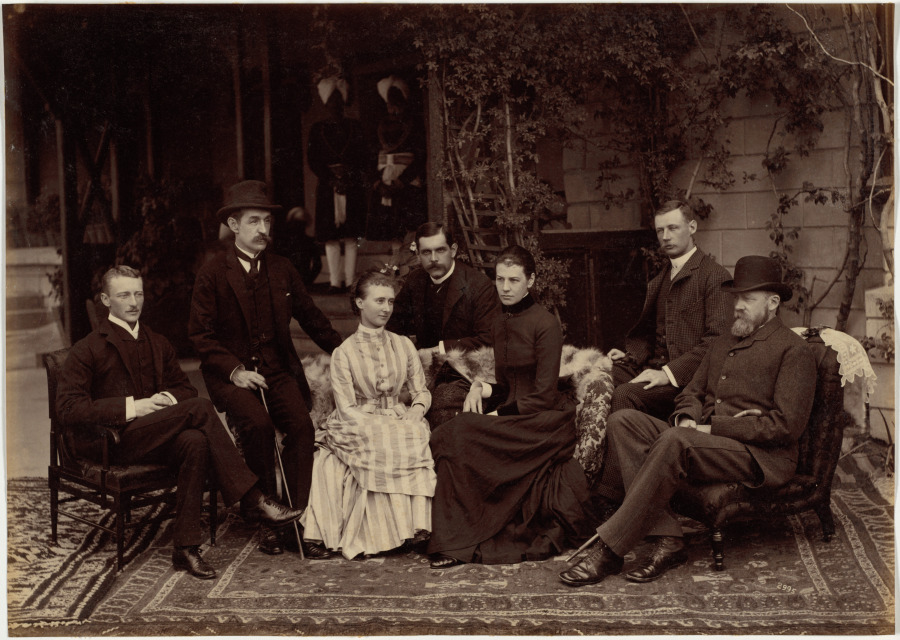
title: His Honor The Lieutenant Governor of the Punjab and Party, Shimla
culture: India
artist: Raja Deen Dayal (Indian, 1844–1905)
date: 1887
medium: albumen print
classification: Photograph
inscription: Stamped in black ink on verso: “21.G.7” Written in pencil on verso: “2995”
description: This photograph may commemorate a family reunion of the Lyalls. In 1887 James Lyall (1838–1916) (possibly on the left) was appointed lieutenant governor of the Punjab region, the same year that his elder brother Alfred Lyall (1835–1911) (second from left) retired as lieutenant governor of North-Western Provinces. After recovering from a serious illness, Alfred visited James in Simla. The women are likely Alfred’s daughter Mary Evelina Lyall (1868–1948) (left) and “Mrs. Lyall,” possibly Mary’s aunt, James Lyall’s wife. A master at staging group portraits, Deen Dayal used symmetry, proximity, height, and other formal devices to indicate the sitters’ interrelationships and relative ranks.